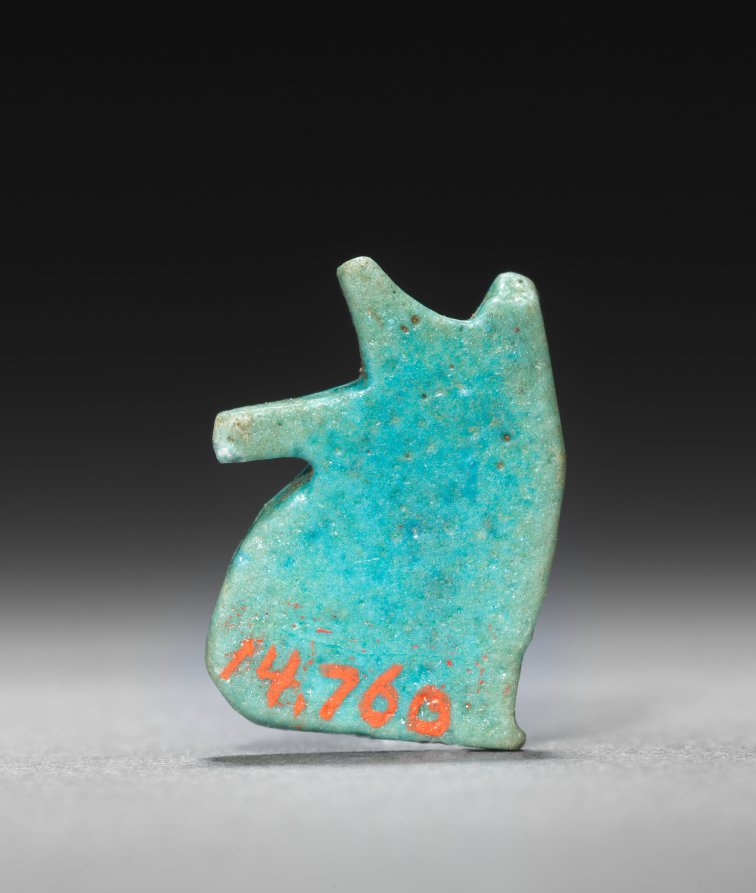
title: Eye of Horus Amulet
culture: Egypt, Third Intermediate (1069–715 BCE), Dynasties 22–25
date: 945–715 BCE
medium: turquoise faience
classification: Amulets